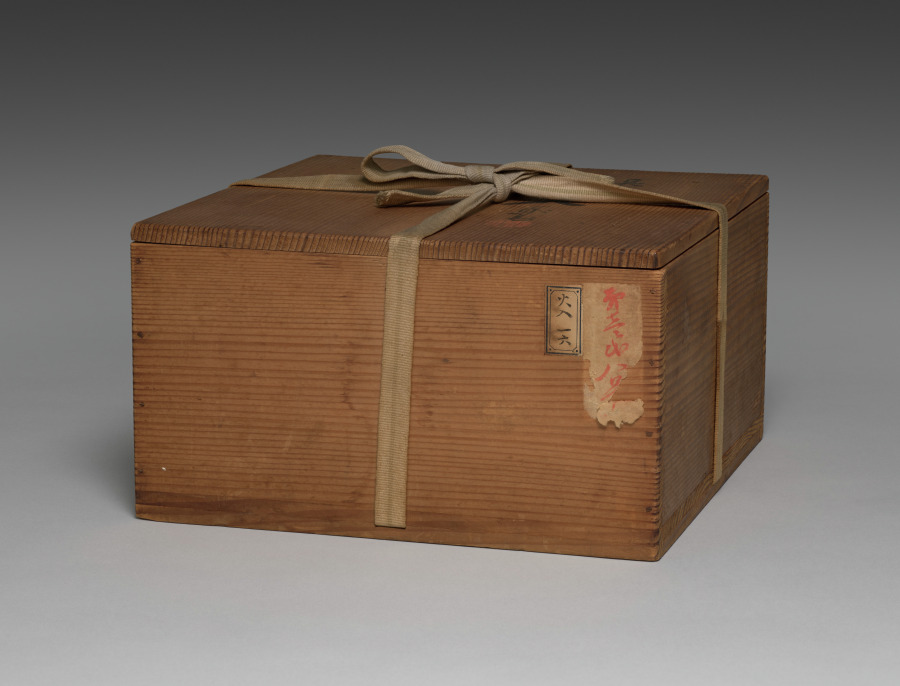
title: Lit Charcoal and Ash Containers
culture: Japan, Meiji period (1868–1912)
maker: Seifū Yohei III (Japanese, 1851–1914)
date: 1893–1914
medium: Set of four containers; porcelain with molded design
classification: Ceramic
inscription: 清風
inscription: The storage box for this set is inscribed and impressed with seals.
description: The box lid for these six-lobed lit charcoal and ash containers, or hiire, identifies them as kōhakuji, another of Yohei III’s translucent cream colors over ivory clay bodies. One might translate the name as “lustrous pearl[–glazed ivory] porcelain.” A hiire was filled with ash with burnt coals at the center so that embers and tobacco ash could be discarded safely during a gathering. Each of the lobes on the containers has a round protrusion set below the rim. The studlike pattern is called ruiza. The term is also used to describe the pattern that rings the shoulder of some flower vases or metal kettles used in chanoyu.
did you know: The Seifu studio generally followed the standard practice in Japan for identifying the artist and object in box inscriptions.